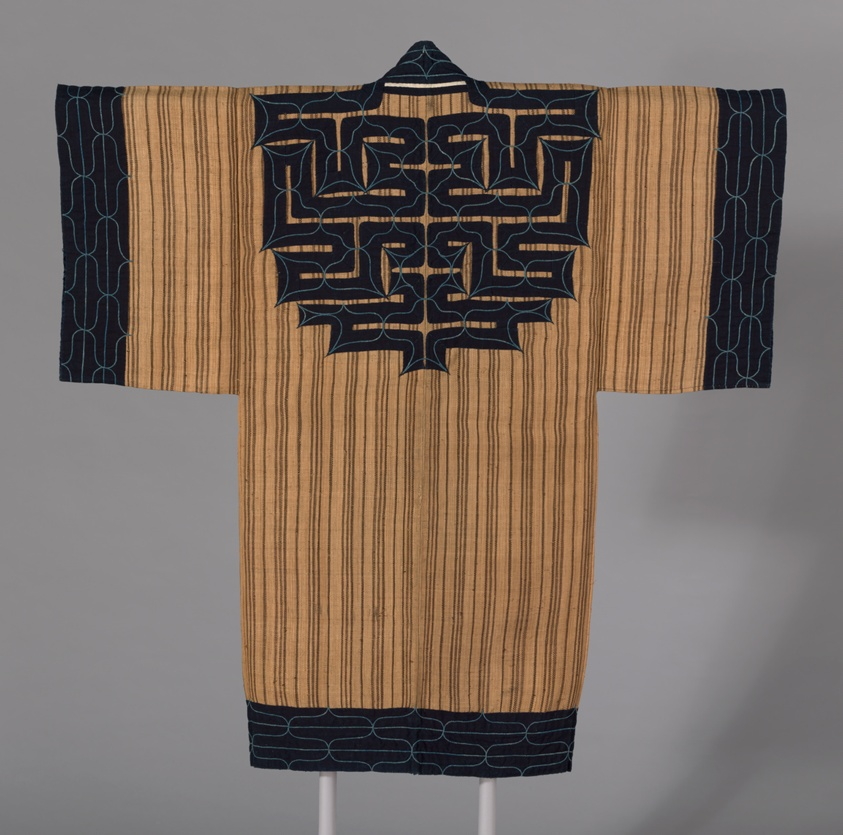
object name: Textile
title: "Attus" Amip (Man's Coat)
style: ainu, Japanism, East Asian, asian, late edo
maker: Ainu (Japan, Hokkaido Island)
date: c. 1860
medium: Elm tree bark fiber, plain weave; center back and outer edges appliquéd with cotton, plain weave; underlaid with cotton, plain weave; embroidered with cotton in laid work and couching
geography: Japan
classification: textile; costume; costume - embroidery; costume - weaving; embroidery; weaving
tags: geometric motif